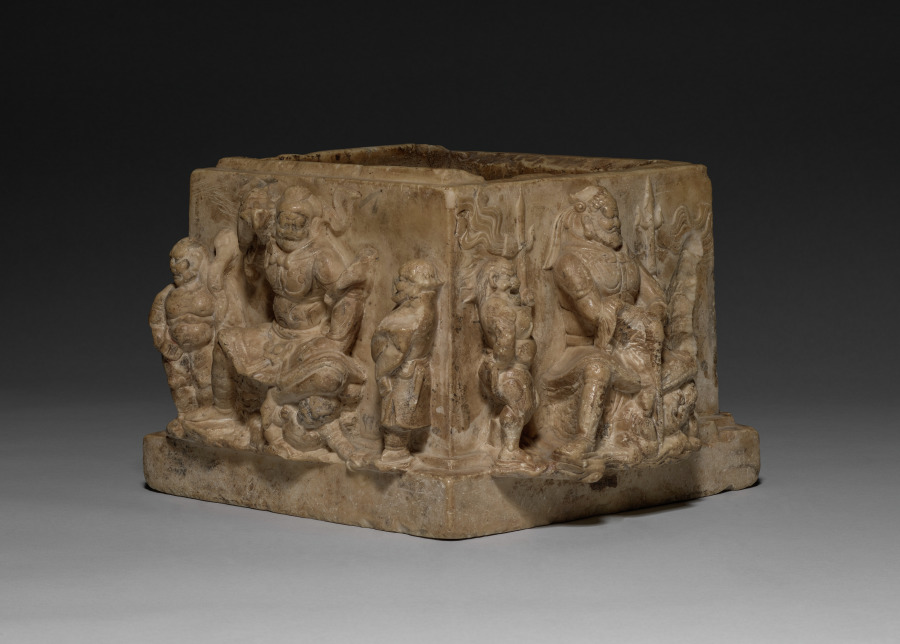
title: Square Urn with Celestial Guardians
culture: China, Tang dynasty (618–907)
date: 700s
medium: marble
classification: Sculpture